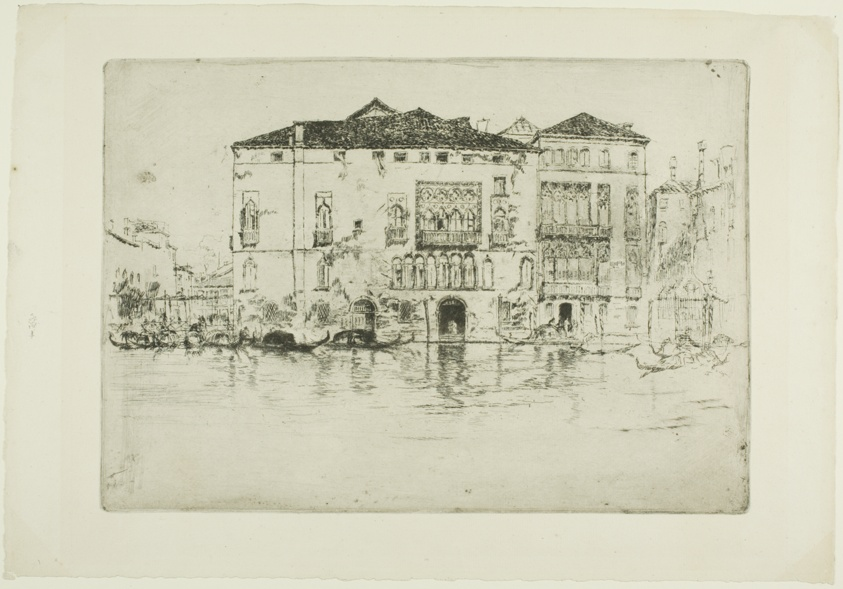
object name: Print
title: The Palaces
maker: James McNeill Whistler (American, 1834-1903)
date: 1879/80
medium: Etching, drypoint and open bite in black ink on ivory laid paper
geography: United States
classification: etching; open bite; drypoint; print; prints and drawing; paper